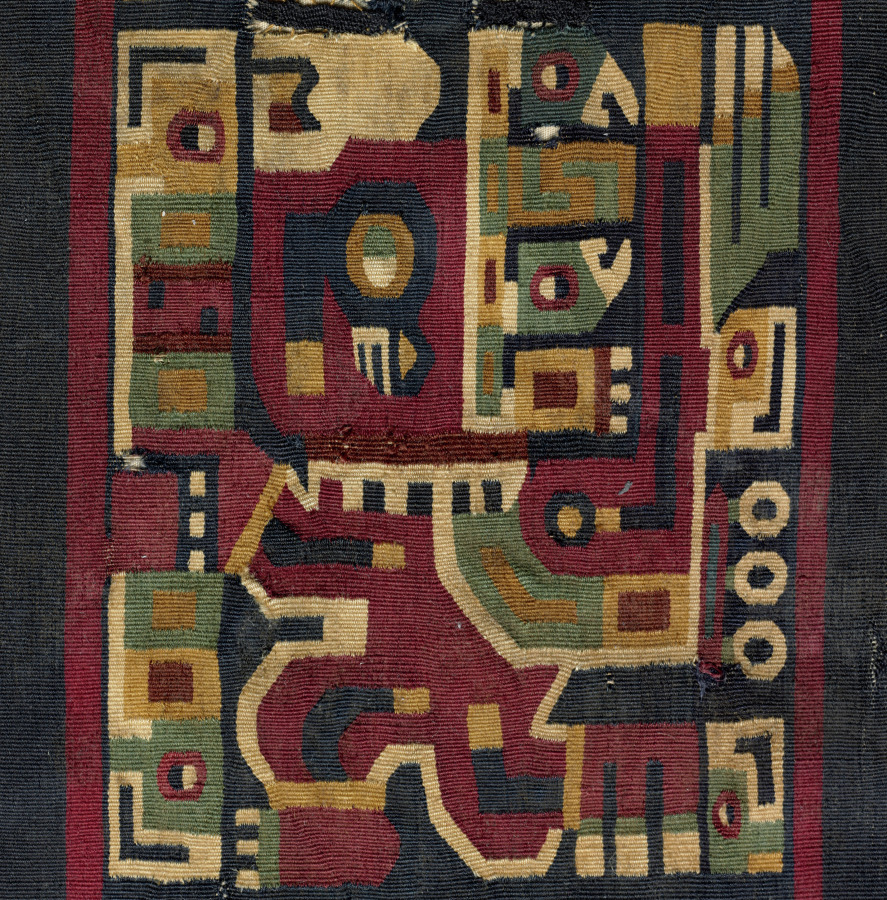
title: Half of a Sleeved Tunic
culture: Central Andes, Middle Horizon, Wari, 6th-11th century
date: c. 500–1000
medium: single-interlocked tapestry; cotton warp; camelid fiber weft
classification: Textile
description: The bird-headed creature in profile that repeats in each of this tunic's design fields gazes upward, holds a staff of authority in front of its body, and wears an ornate headdress behind which a three-feathered wing can be seen. The extremely high technical quality of such tunics suggests that the Wari reserved bird imagery for their most exalted rulers. Here, the original incorporated more than twice as much yarn as the routine--some 19 miles, all handmade and much dyed an inky, dark blue, the most prestigious of Wari colors.